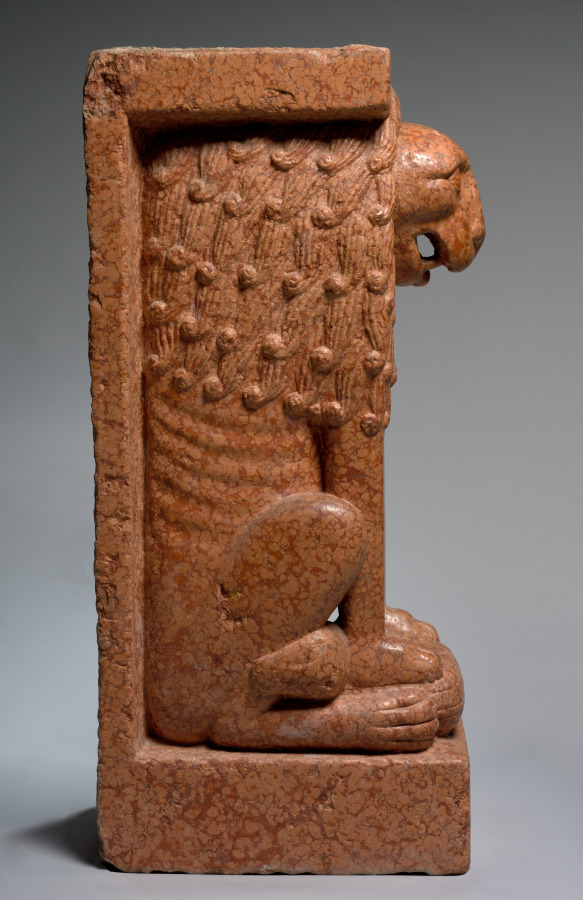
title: Supporting Lion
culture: Italy, style of the 13th century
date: style of the 1200s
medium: pink limestone (known as "Verona Marble")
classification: Sculpture